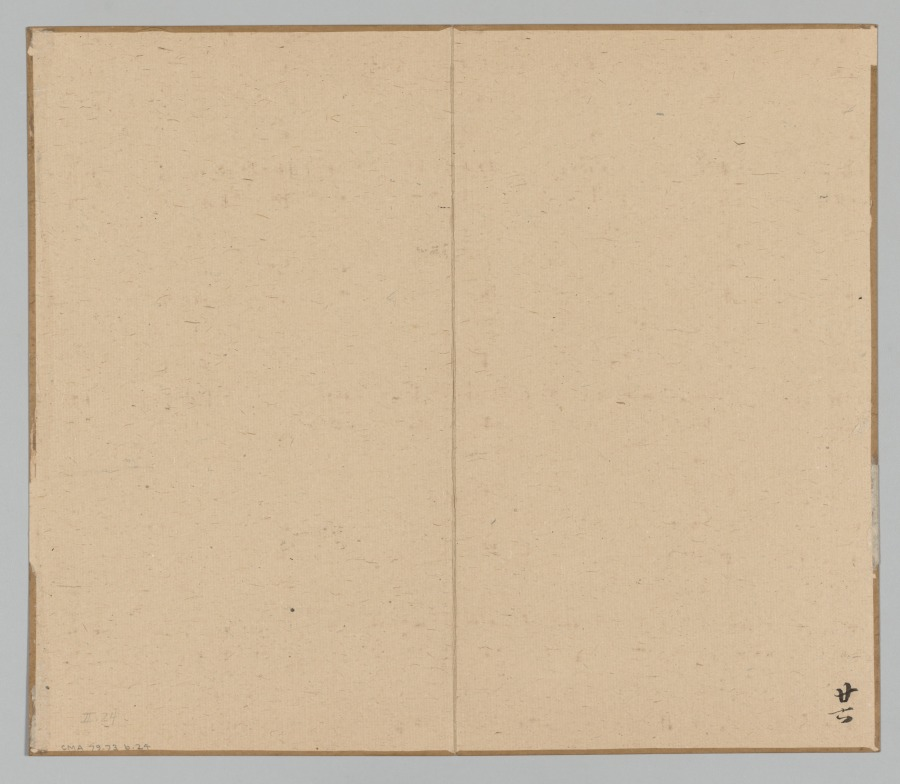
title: Reverberations of Taiga, Volume 2 (leaf 24)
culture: Japan, Edo period (1615–1868)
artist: Aoki Shukuya (Japanese, d. 1802)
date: mid- to late 1700s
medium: double-leaf from a pair of albums; ink and light color on paper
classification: Portfolio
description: Traditionally, young painters in Japan began their studies with an established master-painter. The master's compositions invariably became models that the apprentice copied to learn various ink and brush techniques. Shukuya was a pupil of the famous Kyoto artist Ikeno Taiga, whose style is reflected in these sketches of rocks, trees, and mountains.